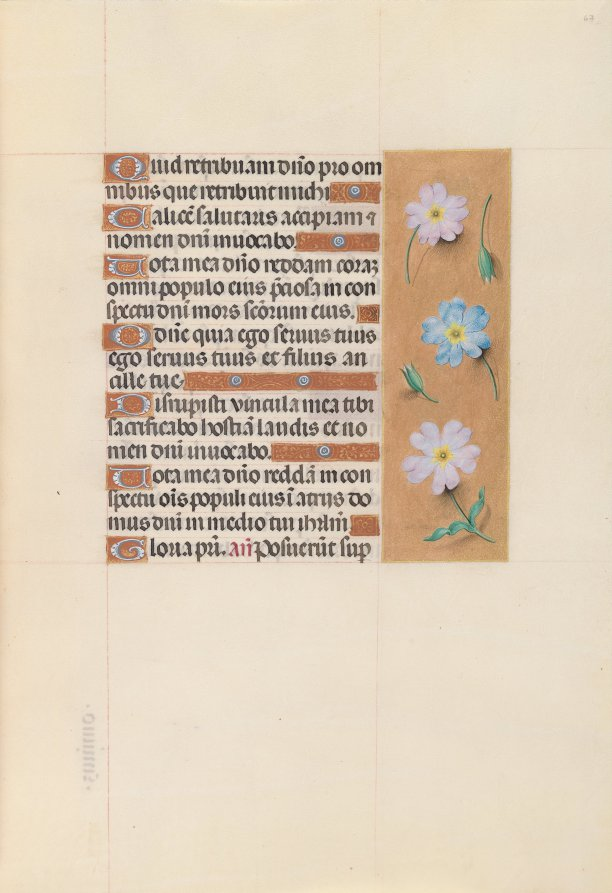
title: Hours of Queen Isabella the Catholic, Queen of Spain: Fol. 67r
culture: Flanders, Ghent and Bruges, late 15th century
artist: Master of the First Prayerbook of Maximillian (Flemish, c. 1444–1519)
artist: and Associates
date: c. 1500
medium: ink, tempera, and gold on vellum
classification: Bound Volume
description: This manuscript was illuminated by a circle of at least five highly organized manuscript painters active in the Flemish cities of Ghent and Bruges. The principal illuminator was Alexander Bening, who painted the majority of the book's miniatures. Manuscripts produced by this circle of artists are renowned for the decoration of their borders, which typically feature a rich variety of realistically-painted flowers, birds, and butterflies. This prayer book, called a book of hours, was intended not for a cleric, but for the private devotions of a lay person-in this case, Isabella the Catholic, Queen of Spain (1451-1504). Isabella's coat of arms embellishes the book's frontispiece. It is unlikely that the book was commissioned by the Queen herself; rather, she probably received it as a diplomatic gift from someone courting her patronage, perhaps Cardinal Francisco Jimenez de Cisneros. A Franciscan friar, Jimenez was dependent upon Isabella for his advancement, first to the post of Queen's confessor in 1492, and then to Archbishop of Toledo in 1495.